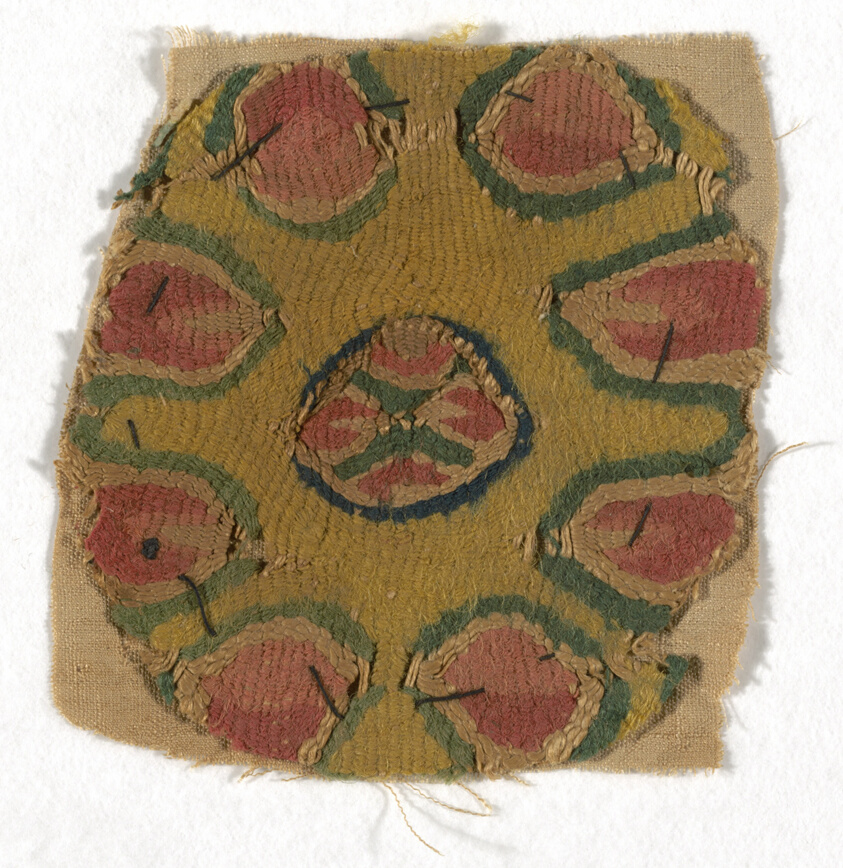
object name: Textile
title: Roundel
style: roman period (egyptian)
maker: Coptic (Egypt)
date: Roman period (30 B.C.– 641 A.D.)/ Arab period (641–969), 5th/8th century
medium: Linen and wool, tapestry weave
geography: Egypt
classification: textile; weaving